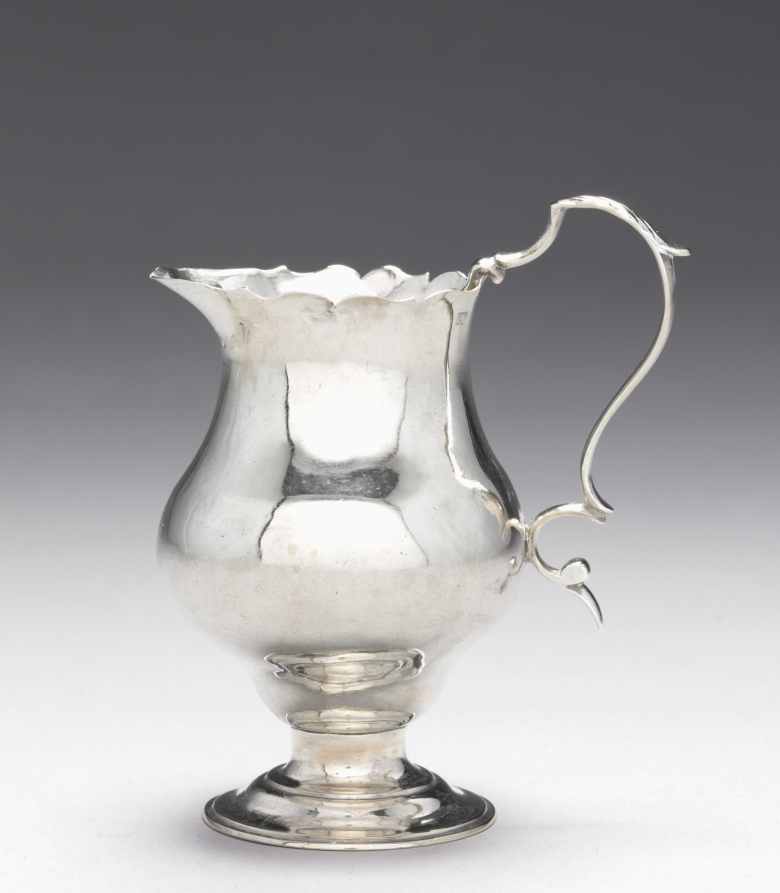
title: Cream Pitcher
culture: America, Massachusetts, Boston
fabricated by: Paul Revere II (American, 1735–1818)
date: c. 1765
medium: silver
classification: Silver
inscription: "P . . .H/to/P . . .E" in block letters under foot, and "MHP" in bright-cut script on front, opposite handle.